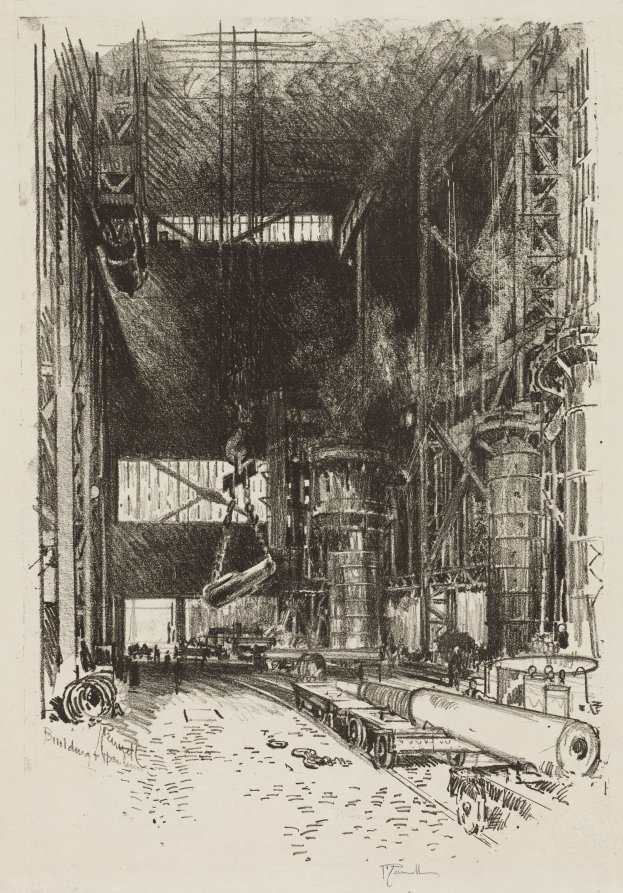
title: English War Work: The New Gun Pit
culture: America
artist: Joseph Pennell (American, 1857–1926)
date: 1916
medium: lithograph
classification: Print